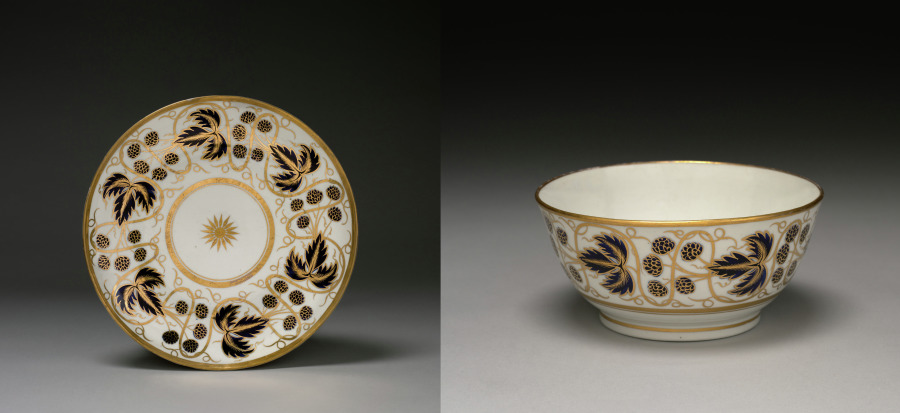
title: Saucer and Bowl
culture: England, late 18th century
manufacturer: Worcester Porcelain Factory (British, established 1751)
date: late 1700s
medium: porcelain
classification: Ceramic